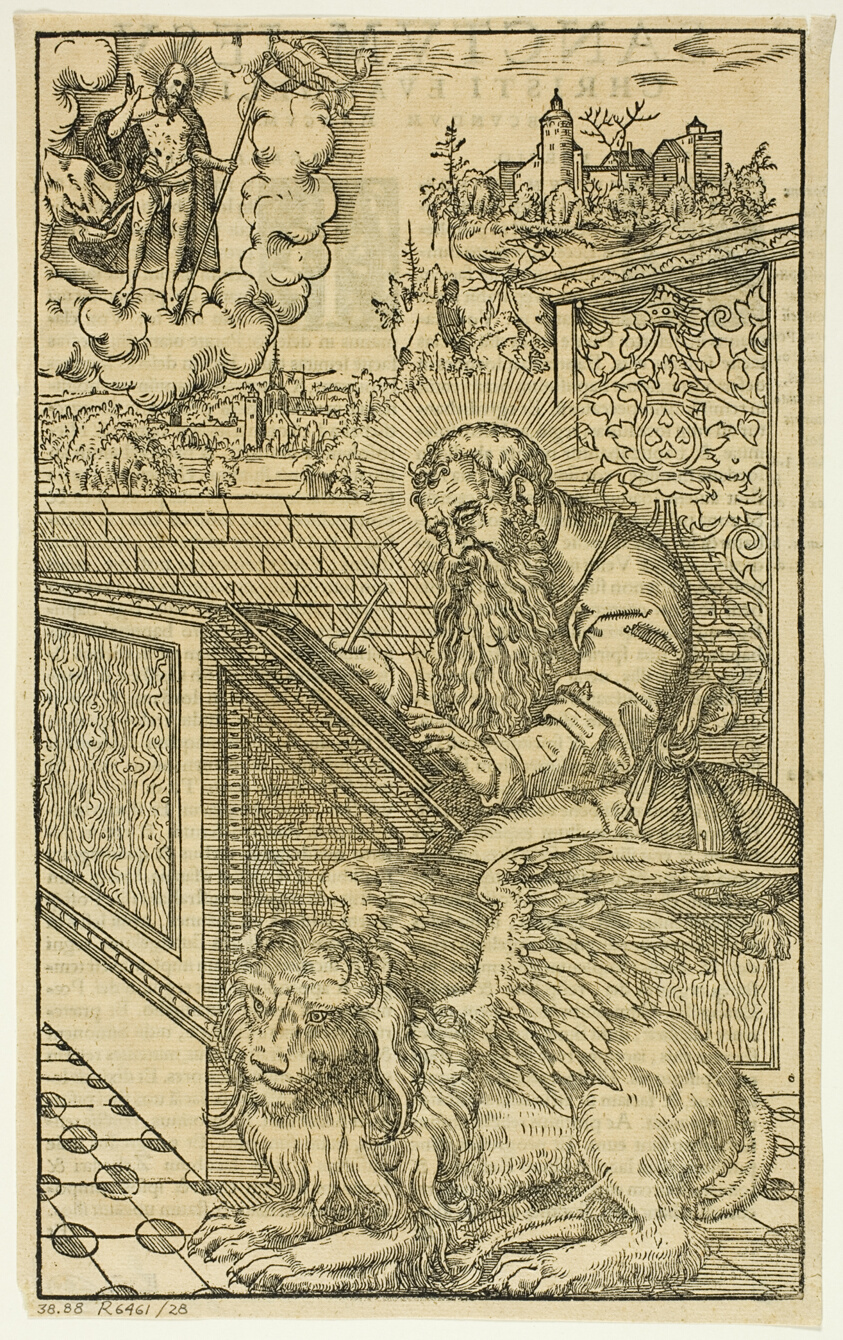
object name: Print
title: Saint Mark from Latin Bible, plate 28 from Woodcuts from Books of the XVI Century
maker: Lucas Cranach, the Younger (German, 1515-1586); published by Nicolaus Wolrab (German, active c. 1536-1551); portfolio text by Max Geisberg (Swiss, 1875-1943)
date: 1541, portfolio assembled 1937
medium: Woodcut in black with letterpress on verso on tan laid paper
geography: Germany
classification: woodcut; print; prints and drawing